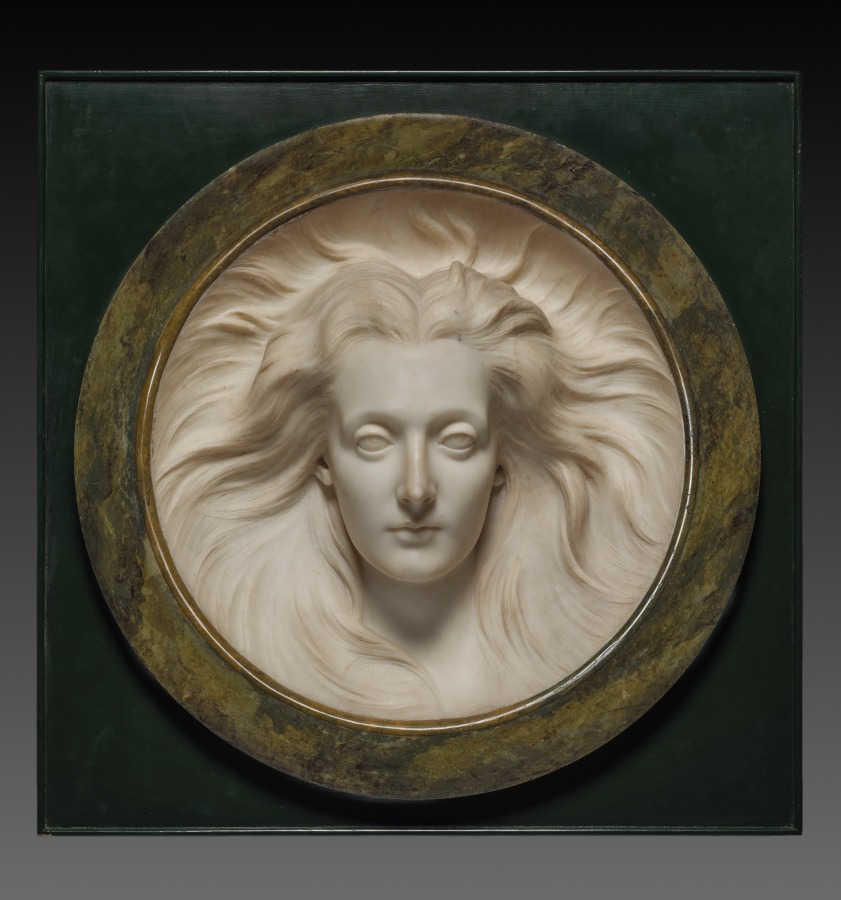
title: Mary, Lady Molyneux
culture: England, 19th century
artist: Alexander Munro (British, 1825–1871)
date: 1868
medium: marble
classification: Sculpture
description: Munro's method of portraying Lady Molyneux, with her head placed squarely in the center of a circle and her hair radiating outward from her face, gives the image an unusual emotional intensity that is probably the result of focusing relentlessly on the particular character of her features.